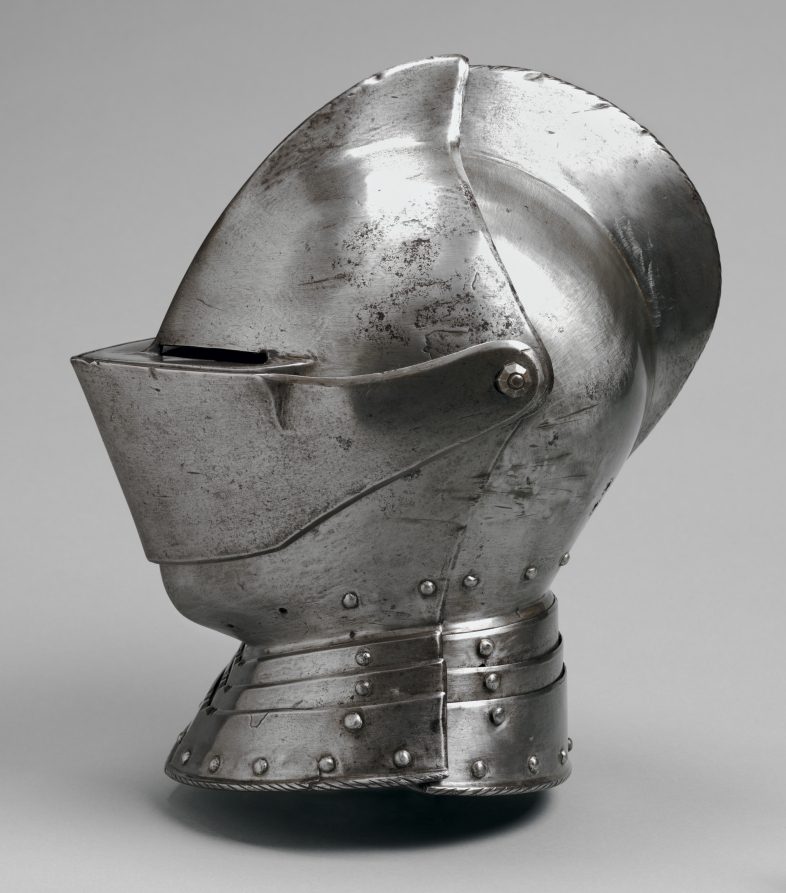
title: Helmet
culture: Germany, Saxony, 16th century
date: c. 1560–80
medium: steel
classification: Arms and Armor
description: This helmet was developed for the joust, a sporting combat of arms between two mounted contestants. This example shows the asymmetry of jousting armor. The participants rode along a wall-like barrier known as a "tilt" with their left sides facing. Consequently, armor on that side of the body tended to be thicker. The breath holes in the helmet were placed on the right side (farthest from an opponent's lance) to avoid injuries from splinters. The popularity of jousts and tournaments peaked around 1500 and required armor and other sporting equipment adapted for the endlessly varied games. By the reign of Emperor Maximilian I (1493–1519), there were at least 11 different forms of mounted jousts, exclusive of the numerous ceremonial combats on foot using such weapons as swords, halberds, pikes, and throwing axes. Each blow in the contest, especially favored in Germany, was carefully numbered and prescribed by rules.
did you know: Jousting contestants wore armor and charged at each other full speed on horseback, attempting to dismount the other with a lance. Such equipment protected contestants from injury, much like the helmet worn by football players today.